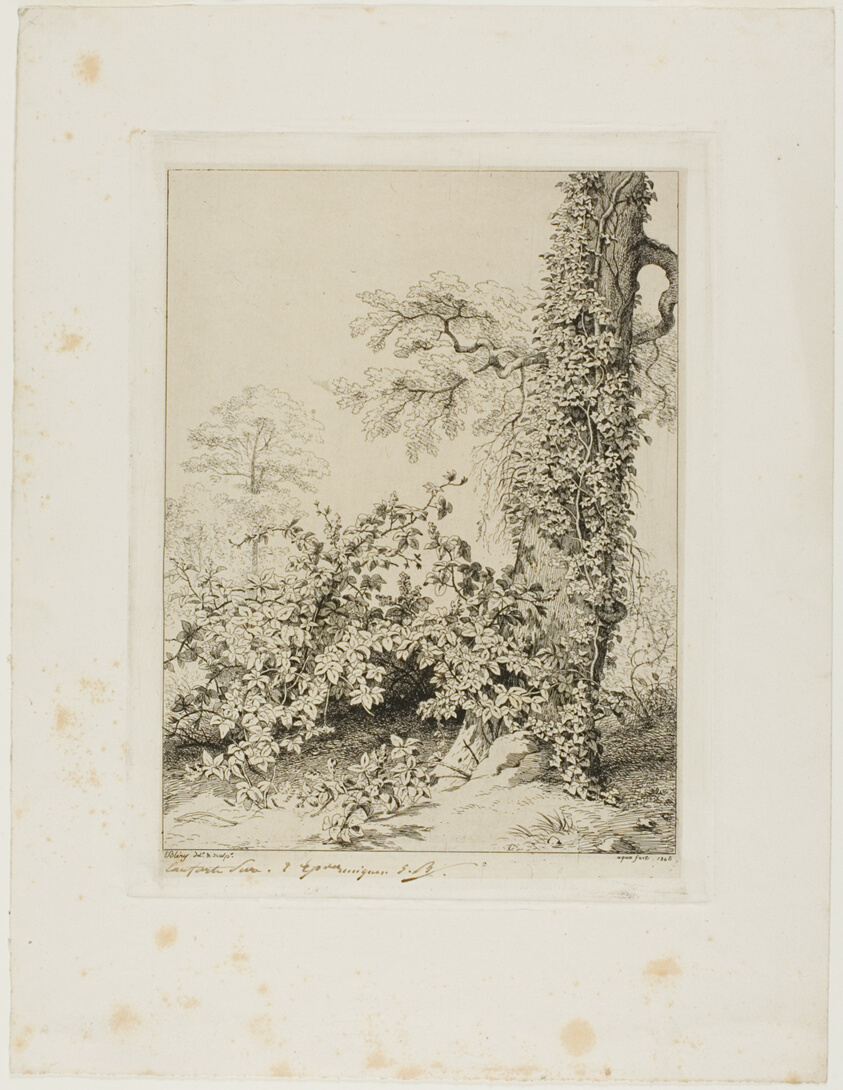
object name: Print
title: Bramble and Ivy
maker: Eugène Blery (French, 1805-1887)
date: 1845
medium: Etching and drypoint on ivory wove chine collé on ivory wove paper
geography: France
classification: etching; print; prints and drawing